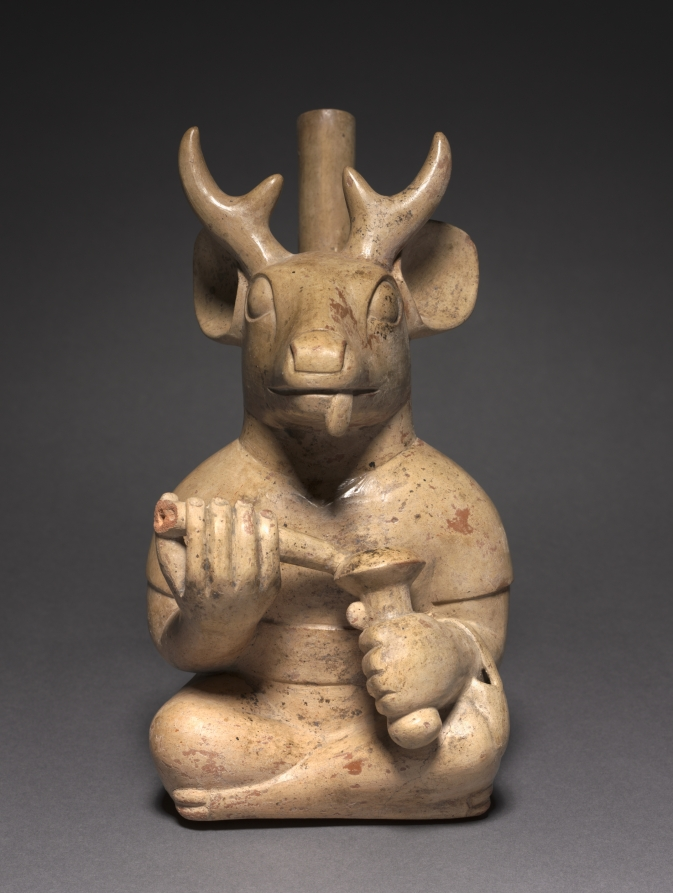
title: Deer-Headed Figure Vessel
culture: Central Andes, North Coast, Moche people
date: 200–850 CE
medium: ceramic, slip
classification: Vessels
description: Moche imagery includes an intriguing world of creatures that mingle traits from different realms: beans sprout human legs and race up a spout, jars leap with human feet to pour themselves, and animals wield weapons in two hands. This figure, with a stag’s head but a human’s body, is an example. He is engaged in a coca-leaf chewing ritual and thus holds a bag for the leaves along with a container of powdered lime that is one of the ritual’s key ingredients.